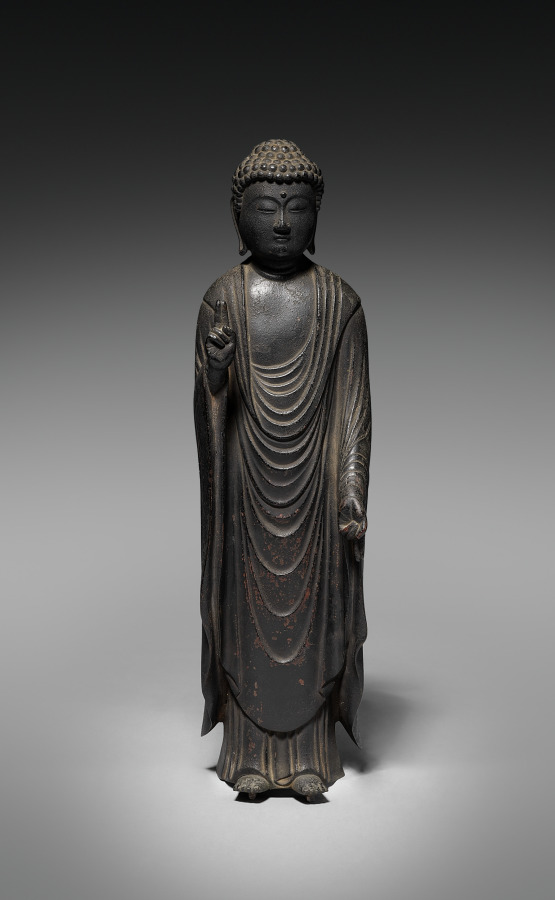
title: Amida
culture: Japan, Kamakura period (1185–1333) to Nanbokuchō period (1336–92)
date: 1300s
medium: patinated bronze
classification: Sculpture